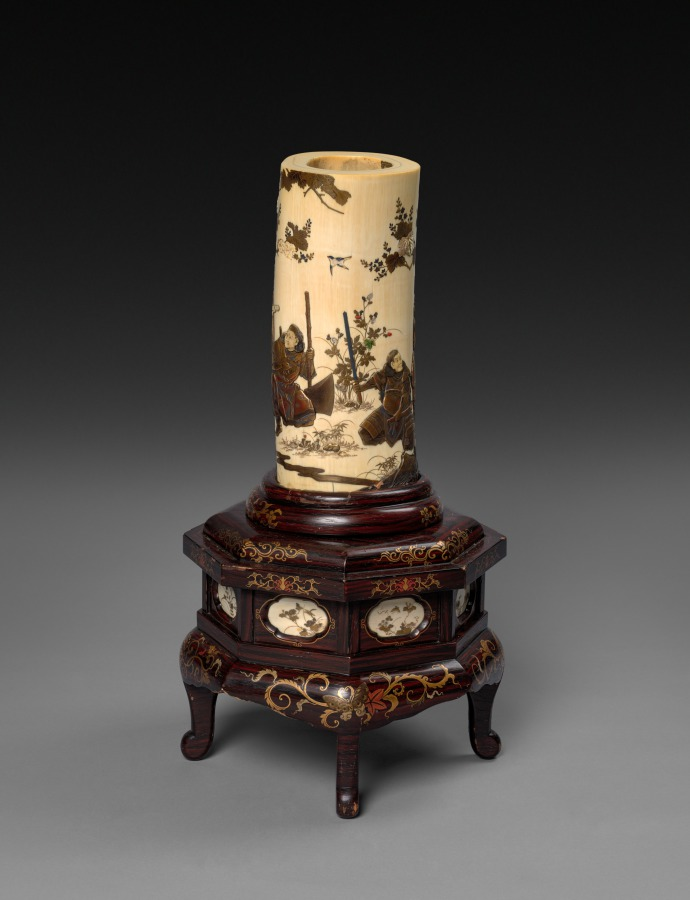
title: Ivory Tusk Vase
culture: Japan, Meiji period (1868–1912)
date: late 1800s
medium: carved ivory, pigment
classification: Ivory